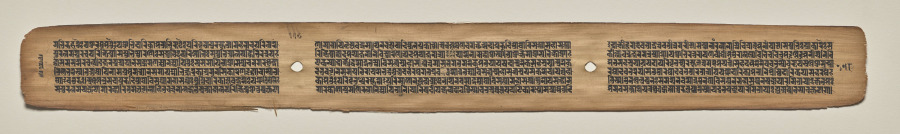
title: Text, folio 178 (verso), from a Manuscript of the Perfection of Wisdom in Eight Thousand Lines (Ashtasahasrika Prajnaparamita-sutra)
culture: Eastern India, Bihar, Vikramashila Monastery. Painting: Nepal, Kathmandu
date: Sunday, September 14, 1119 (year 239 of the Newar Samvat in the month of Ashvina)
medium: gum tempera and ink on palm leaves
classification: Painting